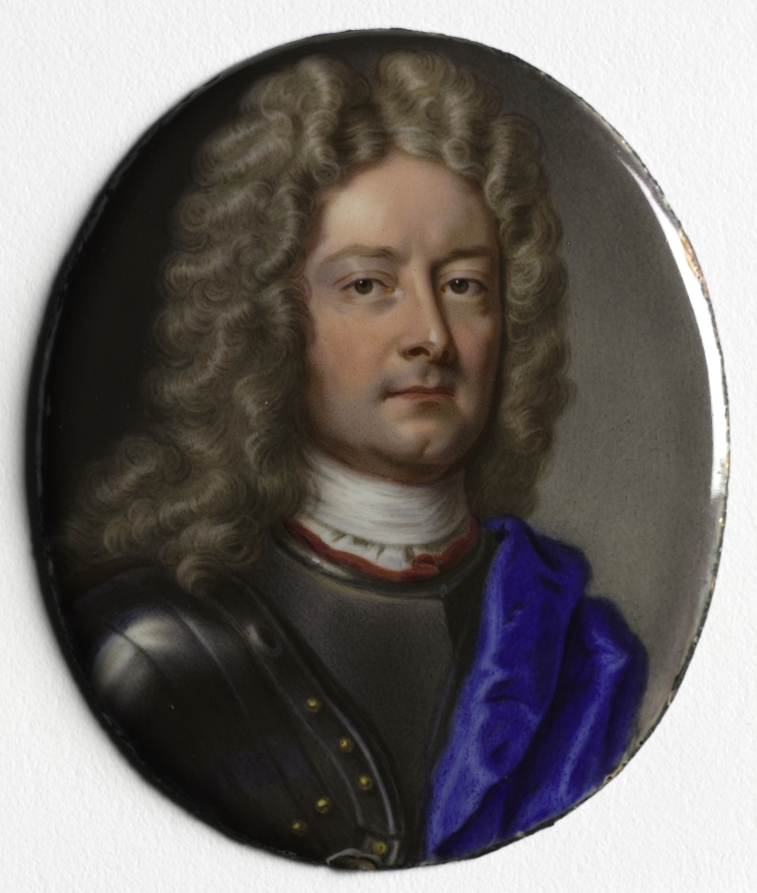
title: Portrait of John Churchill, 1st Duke of Marlborough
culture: England, 18th century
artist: Christian Friedrich Zincke (German, 1683/85–1767)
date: 1715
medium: enamel on copper in a gilt metal frame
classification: Portrait Miniature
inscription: signed on back: CF Zincke fecit/ 1715. [CF in monorgram].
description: Unlike fragile portrait miniatures painted in watercolor on vellum or ivory, which are prone to cracking, fading, and flaking, enamels are resilient, impervious to the effects of light, and retain their striking original colors over time. Partly for this reason enamel was considered ideal for reproducing famous paintings and treasured portraits in a reduced and luminous form. The complicated and labor-intensive process of enameling required the artist to fire numerous layers of colored metal oxide at different temperatures, which made it difficult to produce a faithful portrait likeness, though masters of the medium were able create portraits of remarkable subtlety imbued with the sitter's personality. The heyday of enamel painting was the late 1600s and early 1700s. Among the enamel specialists was Zincke, who worked in England where he was patronized by Queen Anne, King George I, and King George II.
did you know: Although miniatures are often regarded as a private art form exchanged between loved ones, the nature of this enamel was likely political.